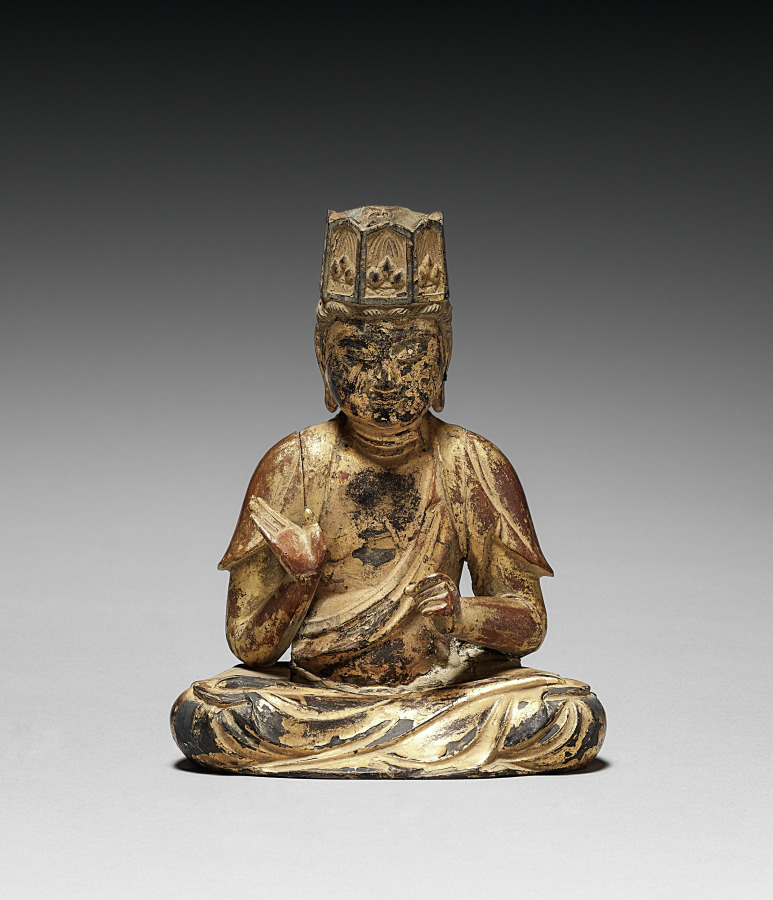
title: Bodhisattva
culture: Japan, Heian period (794–1185)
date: 900s-1100s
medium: gilded wood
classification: Sculpture